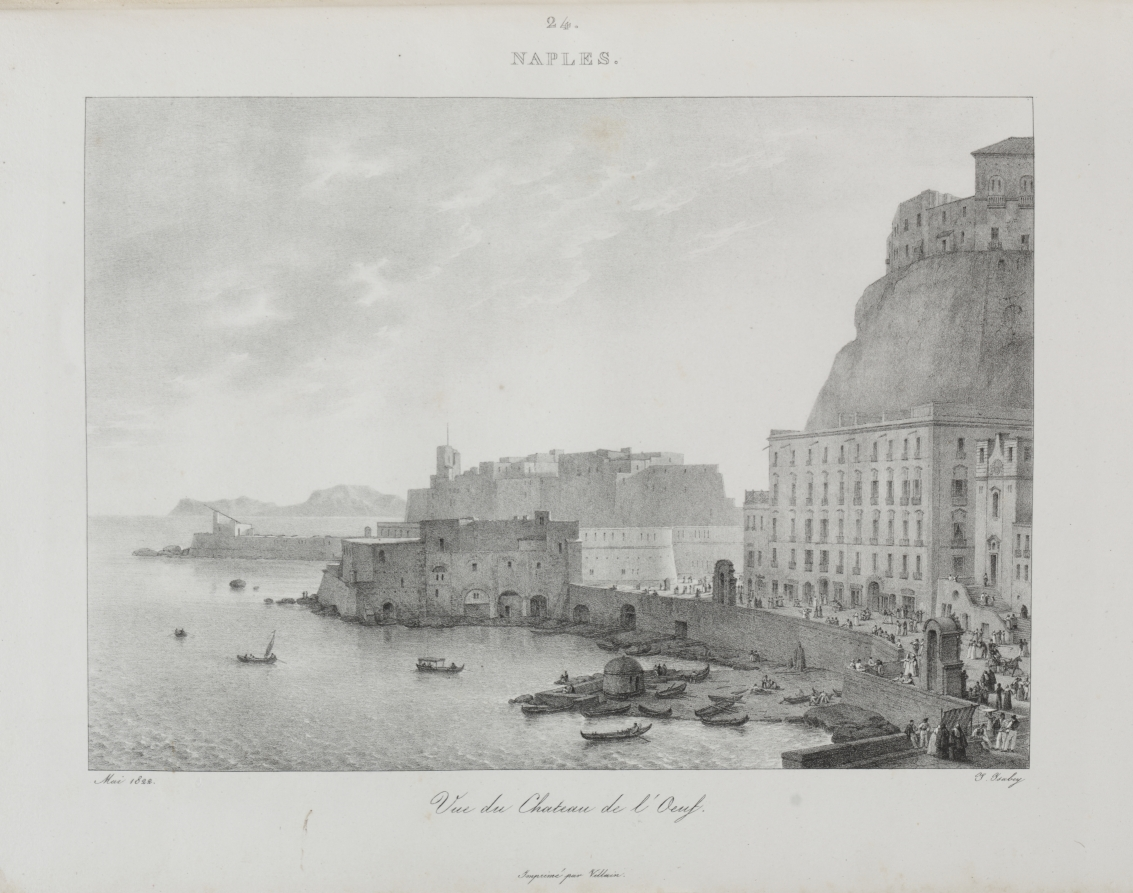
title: Voyage en Italie en 1822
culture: France, 19th century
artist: Jean-Baptiste Isabey (French, 1767–1855)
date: 1833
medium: lithograph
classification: Bound Volume